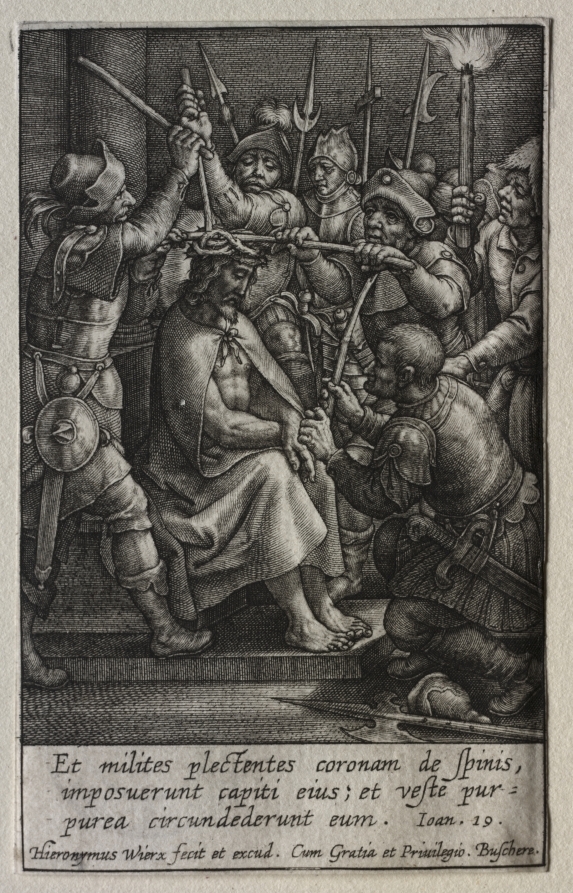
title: The Passion: The Crowning with Thorns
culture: Flanders, late 16th-early 17th century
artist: Hieronymus Wierix (Flemish, 1553–1619)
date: before 1619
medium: engraving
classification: Print